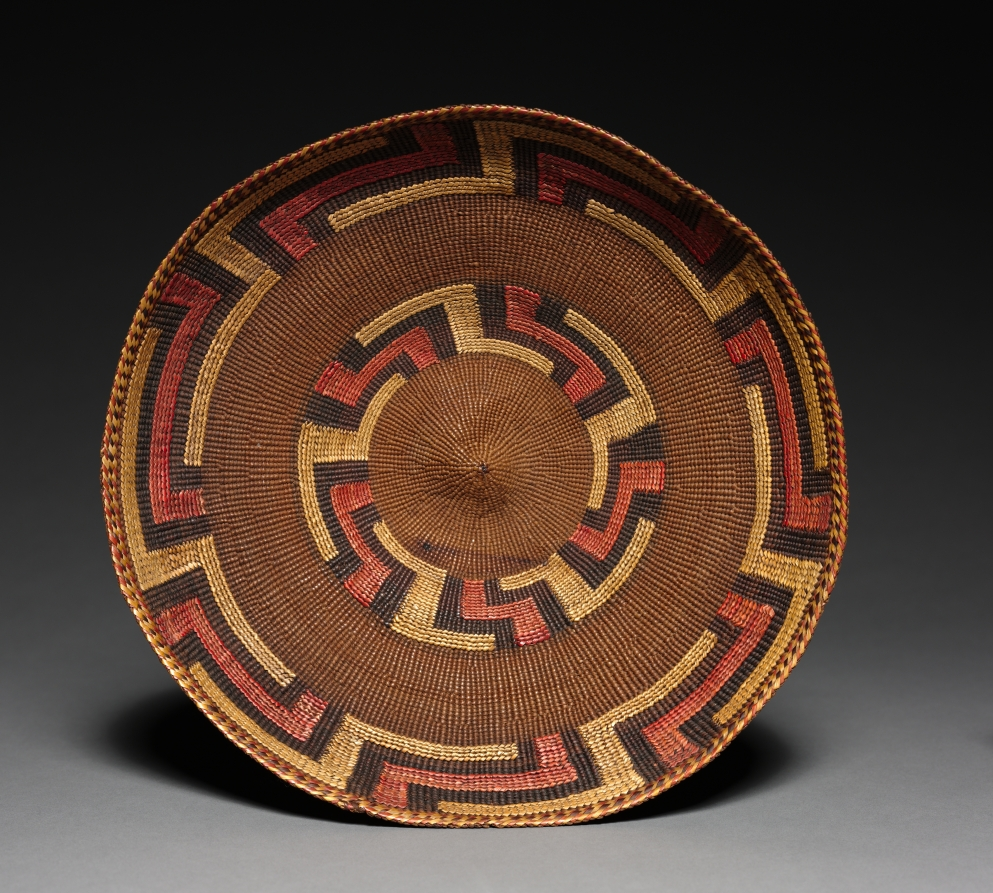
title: Tray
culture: Northwest Coast, Tlingit, late 19th century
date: late 1800's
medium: Spruce root, Beach grass; twined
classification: Basketry